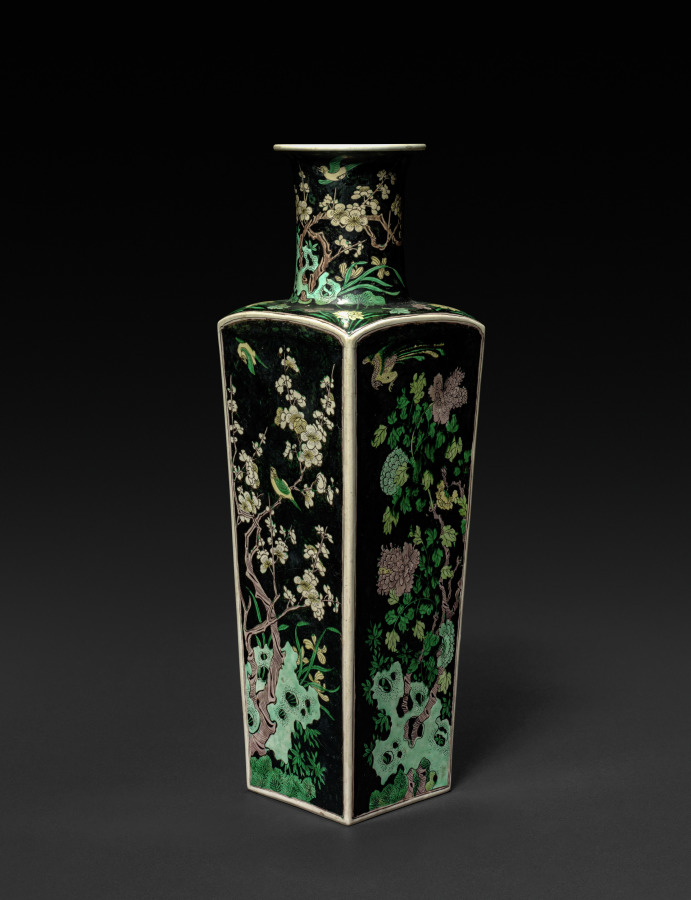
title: Club-shaped Vase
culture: China, Qing dynasty (1644-1911), Kangxi reign (1662-1722)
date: 1662–1722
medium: porcelain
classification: Ceramic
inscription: 碧玉堂製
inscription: [arrow] / Stand #115